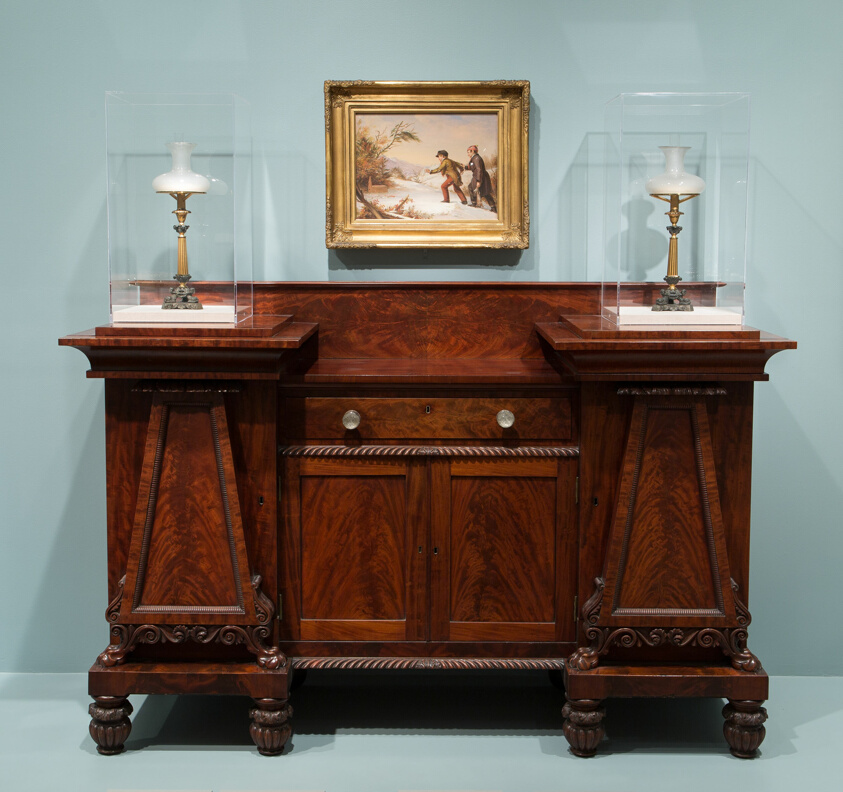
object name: Furniture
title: Sideboard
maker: Artist unknown (American, 19th century); Philadelphia or Baltimore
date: 1825–35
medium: Mahogany, mahogany veneer, poplar, and eastern white pine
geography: Philadelphia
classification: case furniture; furniture; american decorative arts; american arts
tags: furniture